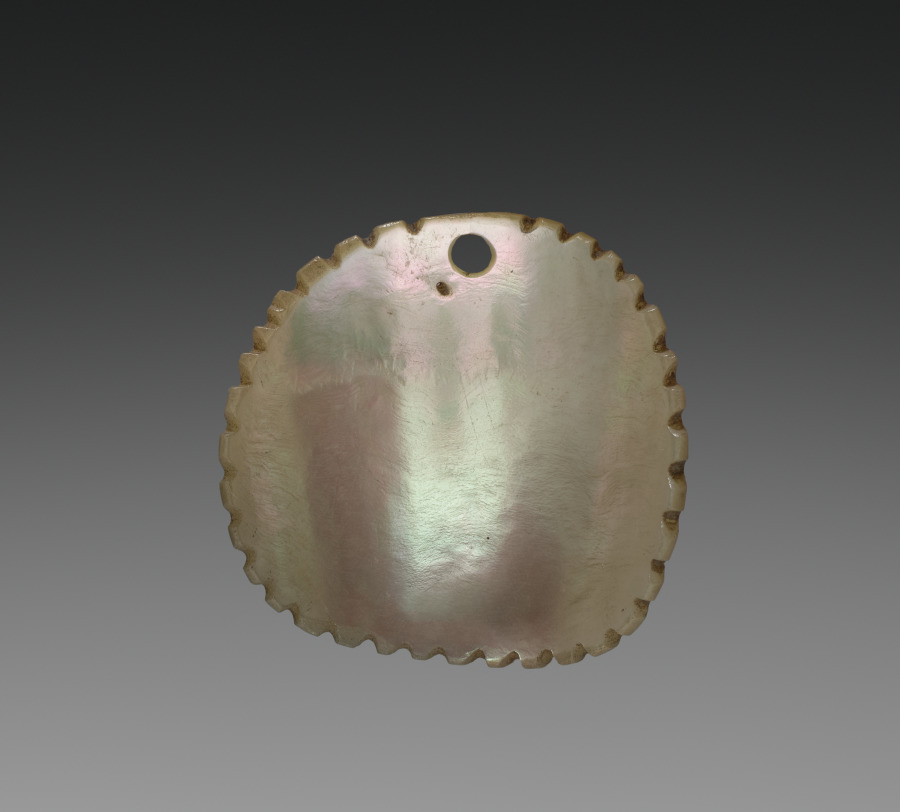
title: Earring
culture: probably Malacian or South Sea Islands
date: before 1916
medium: mother-of-pearl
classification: Jewelry